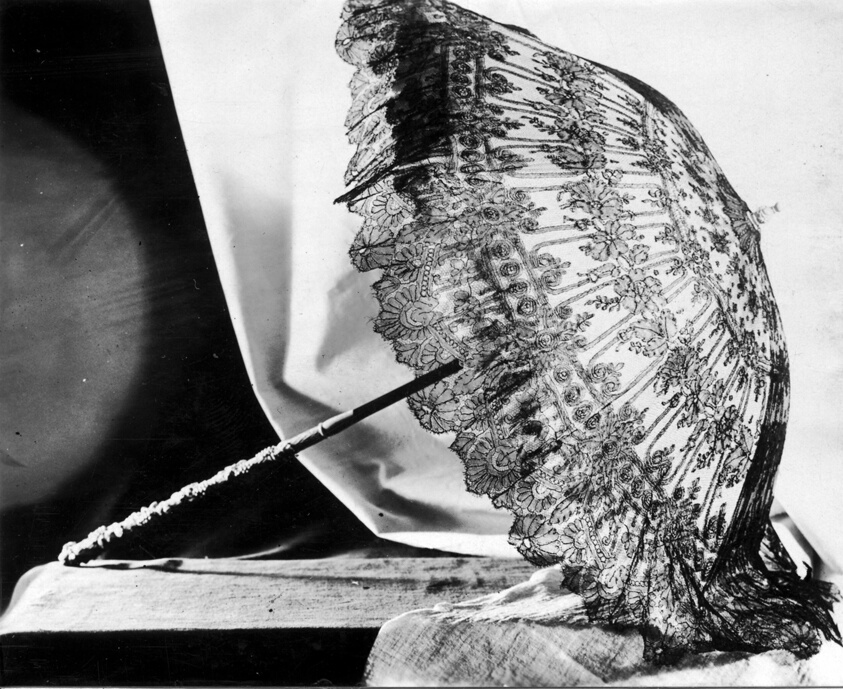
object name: Textile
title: Parasol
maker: France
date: c.1870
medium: Black Chantilly lace over white surah; lined with thin black silk; straight ivory handle carved with design of grapes and leaves. Steel frame, tubing enameled black; modern fastening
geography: France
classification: textile; parasol - lace; costume accessory - parasol